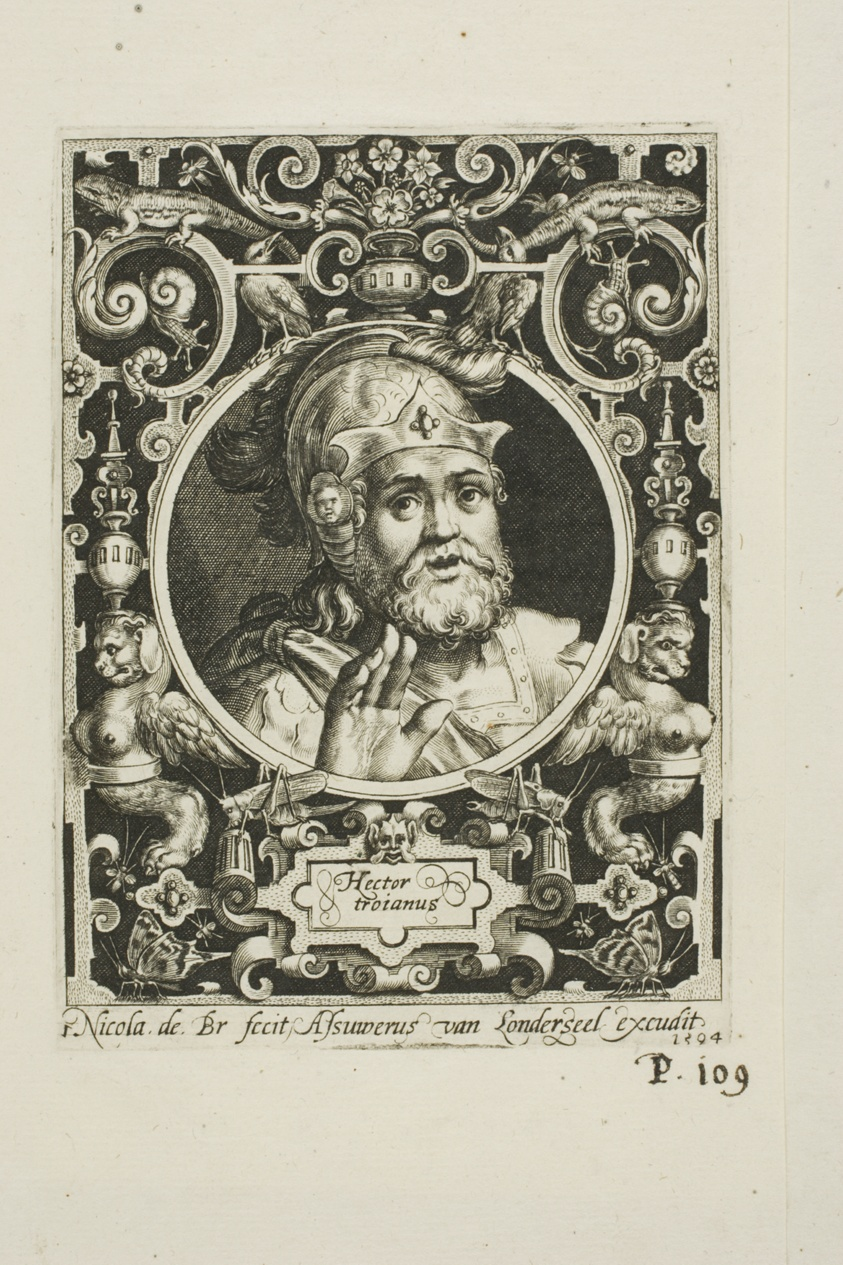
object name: Print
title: Hector of Troy, plate one from The Nine Worthies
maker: Nicolaes de Bruyn (Flemish, 1571-1656); published by Assuerus van Londerseel (Flemish, 1572-1635)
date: 1594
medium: Engraving in black on cream laid paper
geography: Flanders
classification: engraving; prints and drawing; print